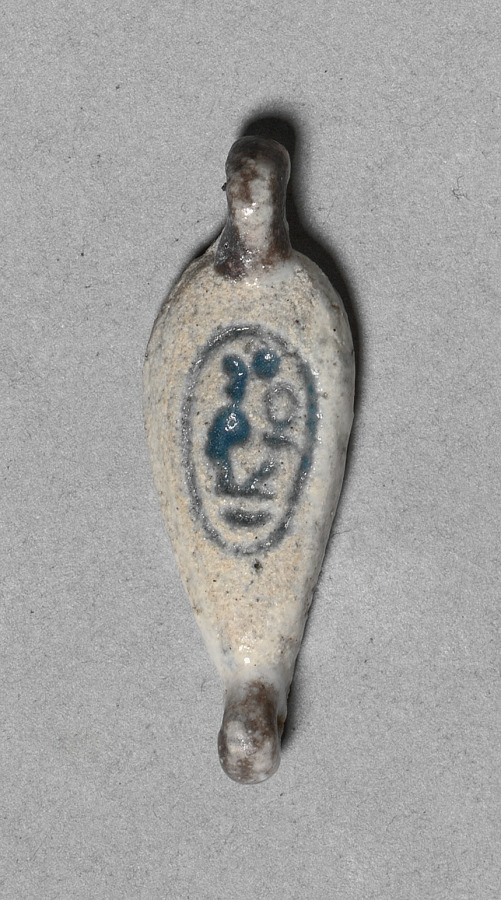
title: Petal-Shaped Bead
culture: Egypt, New Kingdom (1540–1069 BCE), Dynasty 18, reign of Amenhotep III (1390–1352 BCE)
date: c. 1391–1353 BCE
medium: faience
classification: Jewelry